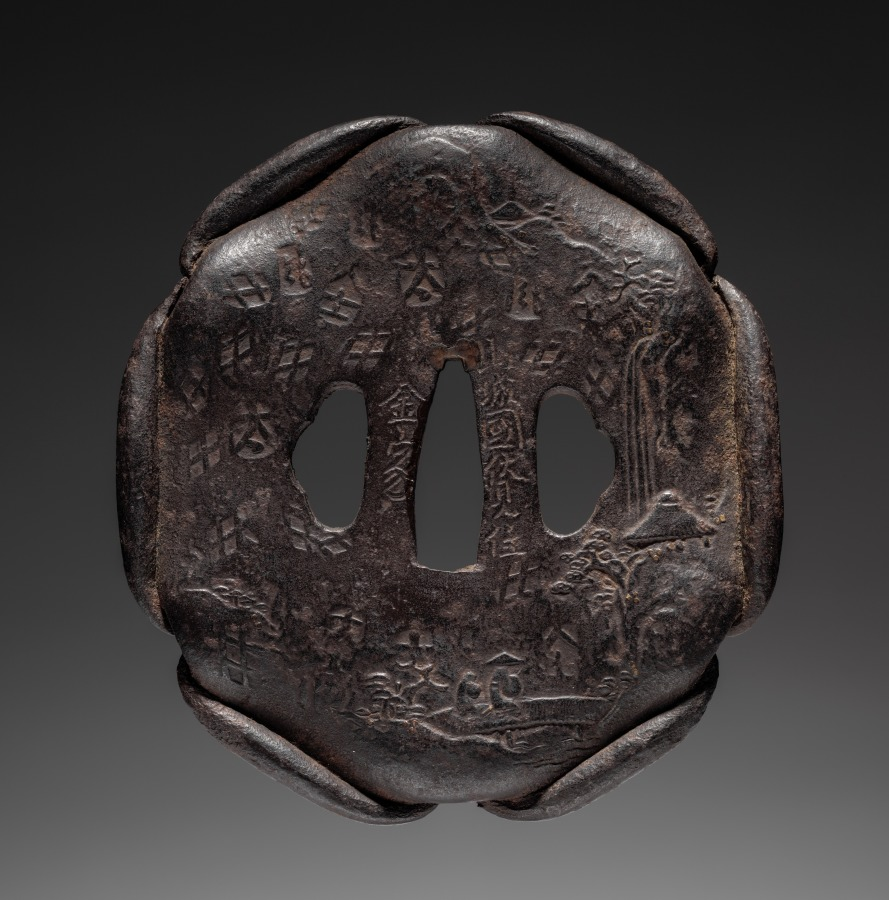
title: Sword Guard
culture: Japan, Edo period (1615–1868)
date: late 1600s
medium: iron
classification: Arms and Armor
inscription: Signature: Kaneiye, residing at Fukushima Yamashiro province